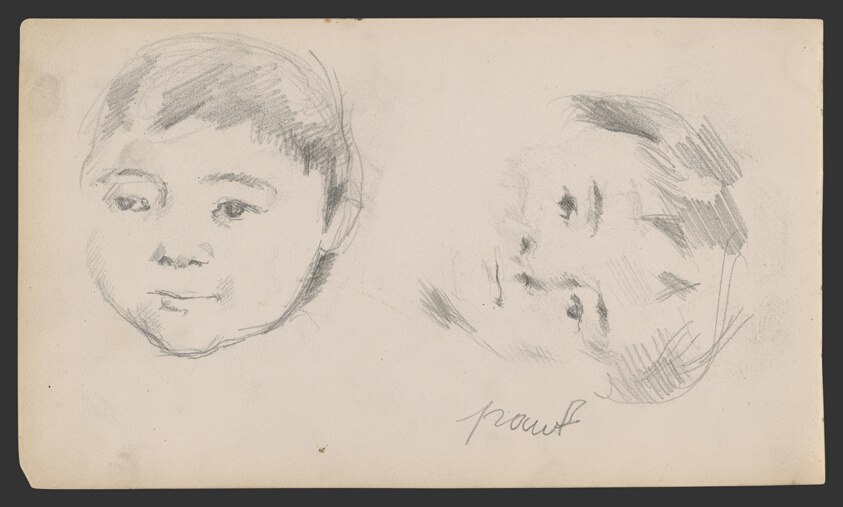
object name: Drawing and Watercolor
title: Sketchbook No. 2 (L'Estaque)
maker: Paul Cézanne; French, 1839-1906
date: 1875–86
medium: Graphite and pen and ink drawings on paper, bound into a book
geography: France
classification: sketchbook; graphite; prints and drawing; paper